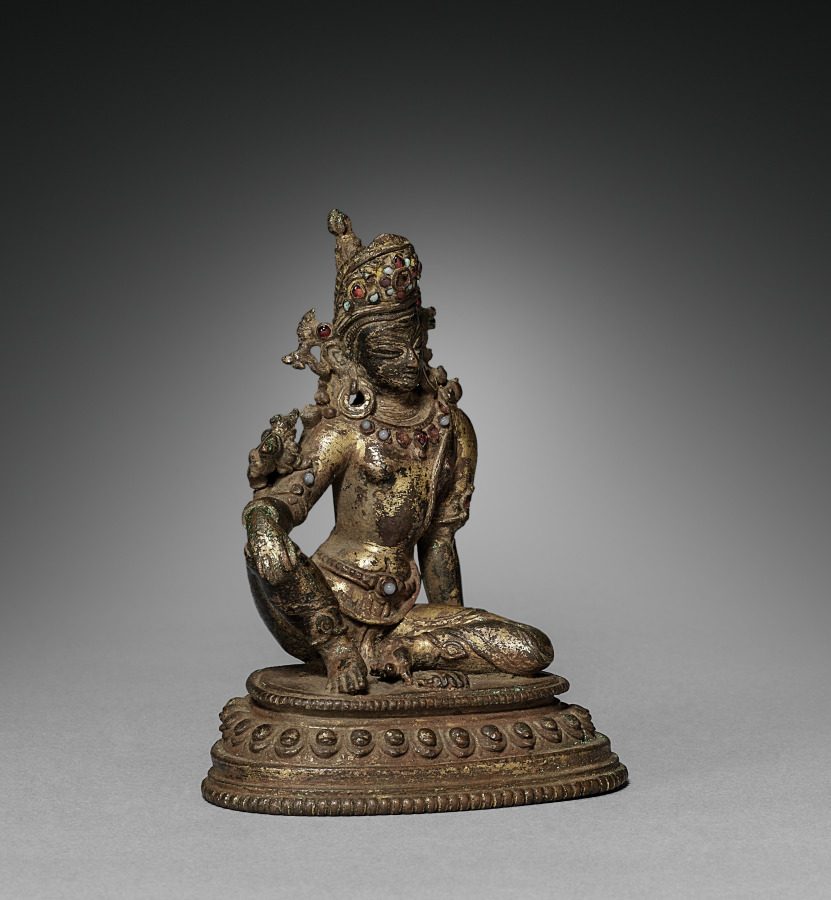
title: Avalokiteshvara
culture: Nepal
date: 1300s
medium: gilt bronze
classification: Sculpture